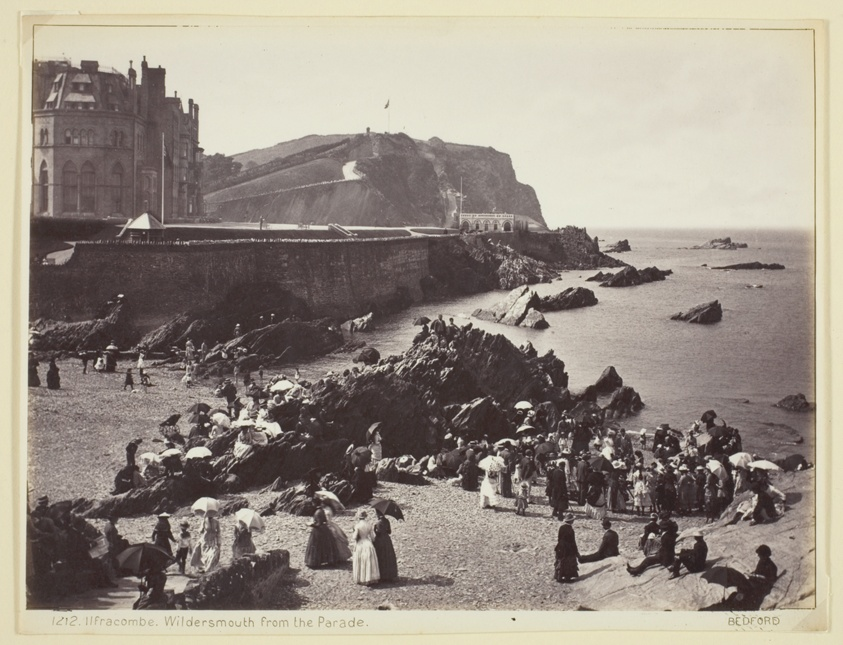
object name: Photograph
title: Ilfracombe, Wildersmouth from the Parade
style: 19th century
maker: Francis Bedford (English, 1816–1894)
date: 1860/94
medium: Albumen print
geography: England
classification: albumen silver print; photographic process; photography; photograph